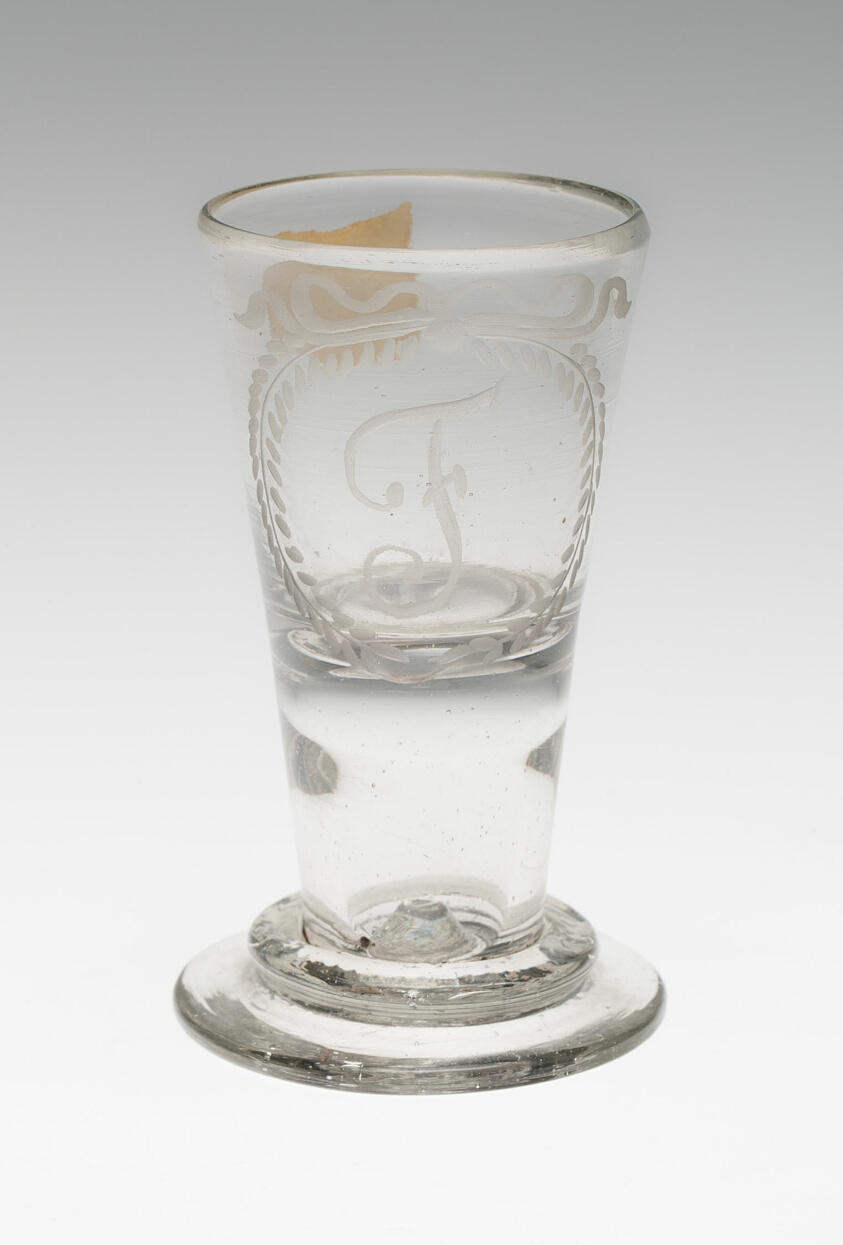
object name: Glass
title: Set of Five Wine Glasses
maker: Germany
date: c. 1800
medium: Glass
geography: Germany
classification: drinking vessel; glass; european decorative arts